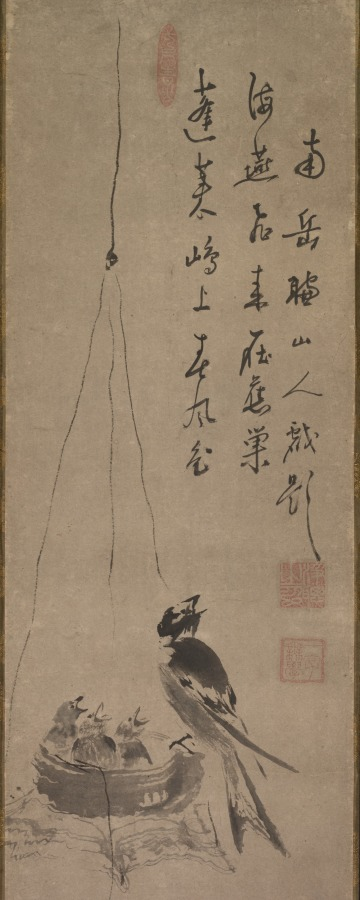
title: Swallows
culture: Japan, Edo period (1615–1868)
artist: Yamaguchi Sekkei (Japanese, 1644–1732)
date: late 1600s–early 1700s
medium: hanging scroll; ink and color on paper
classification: Painting